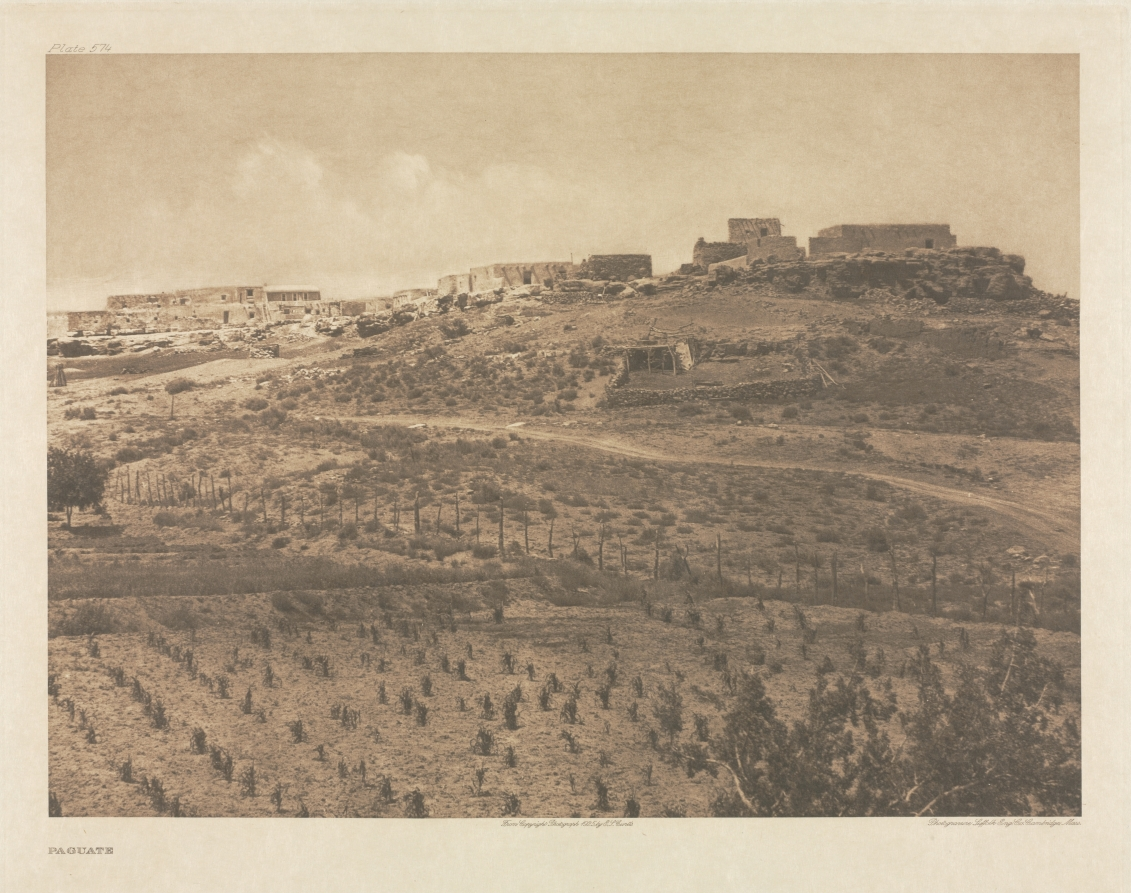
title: Portfolio XVI, Plate 574: Paguate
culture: America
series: The North American Indian: being a series of Portfolios picturing and describing the Indians of the United States, the Dominion of Canada, and Alaska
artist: Edward S. Curtis (American, 1868–1952)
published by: The University Press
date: 1904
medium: photogravure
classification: Portfolio